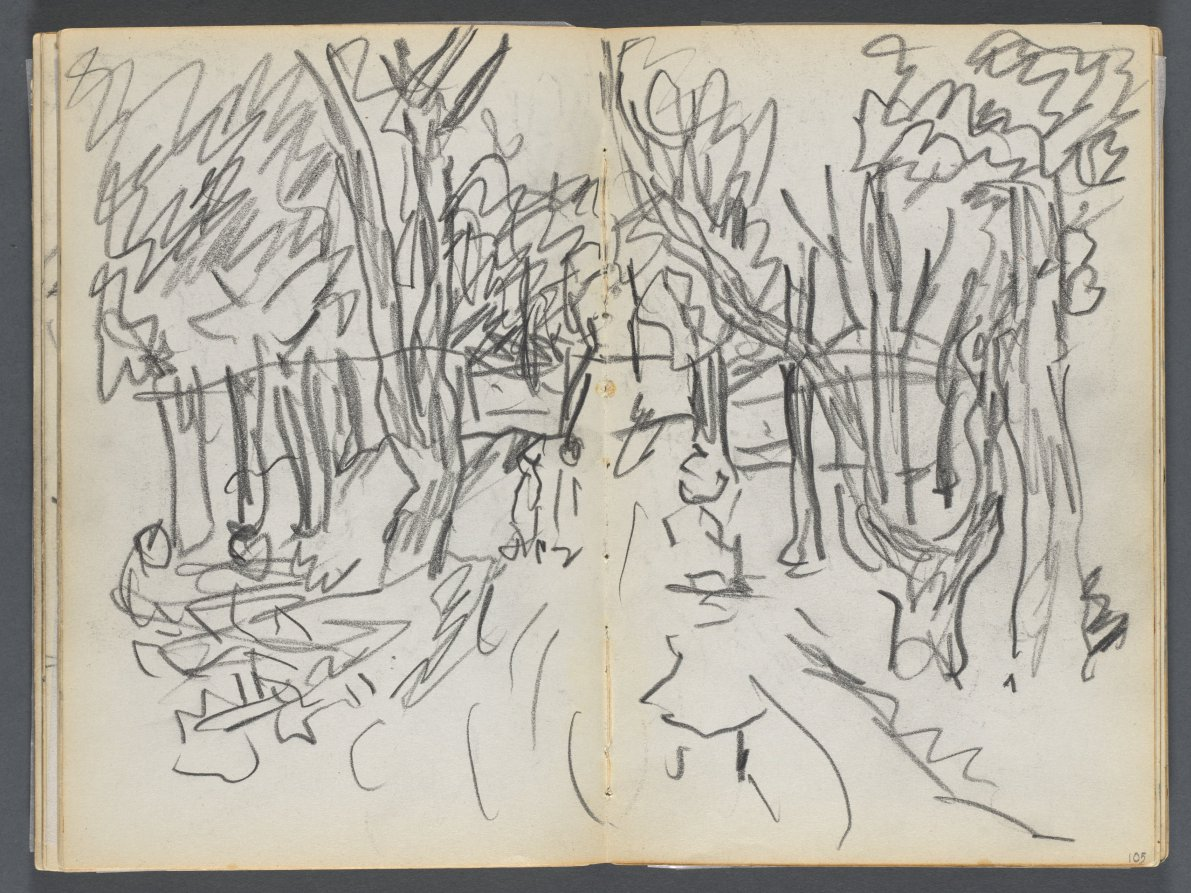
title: Sketchbook, The Dells, N° 127, page 104 & 105: Landscape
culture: America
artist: Maurice Prendergast (American, born Newfoundland [now Canada], 1858–1924)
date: c. 1919–1921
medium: graphite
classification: Bound Volume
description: This sketchbook contains 59 pages of graphite drawings and 16 watercolors made at various locations on Cape Ann, Massachusetts.